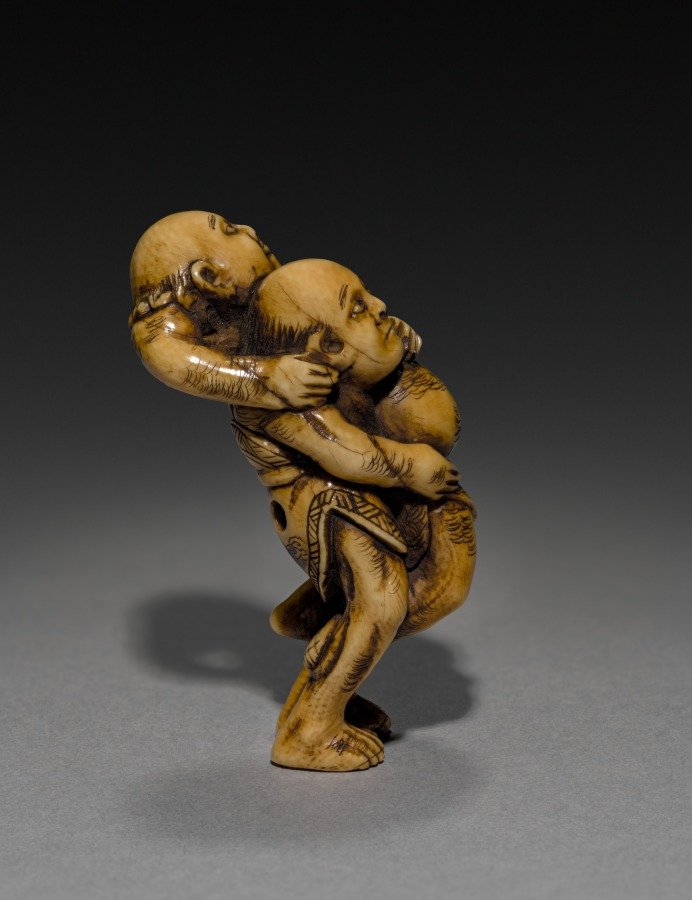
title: Man Carrying Another Man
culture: Japan, Meiji period (1868–1912)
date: early 1900s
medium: ivory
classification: Netsuke